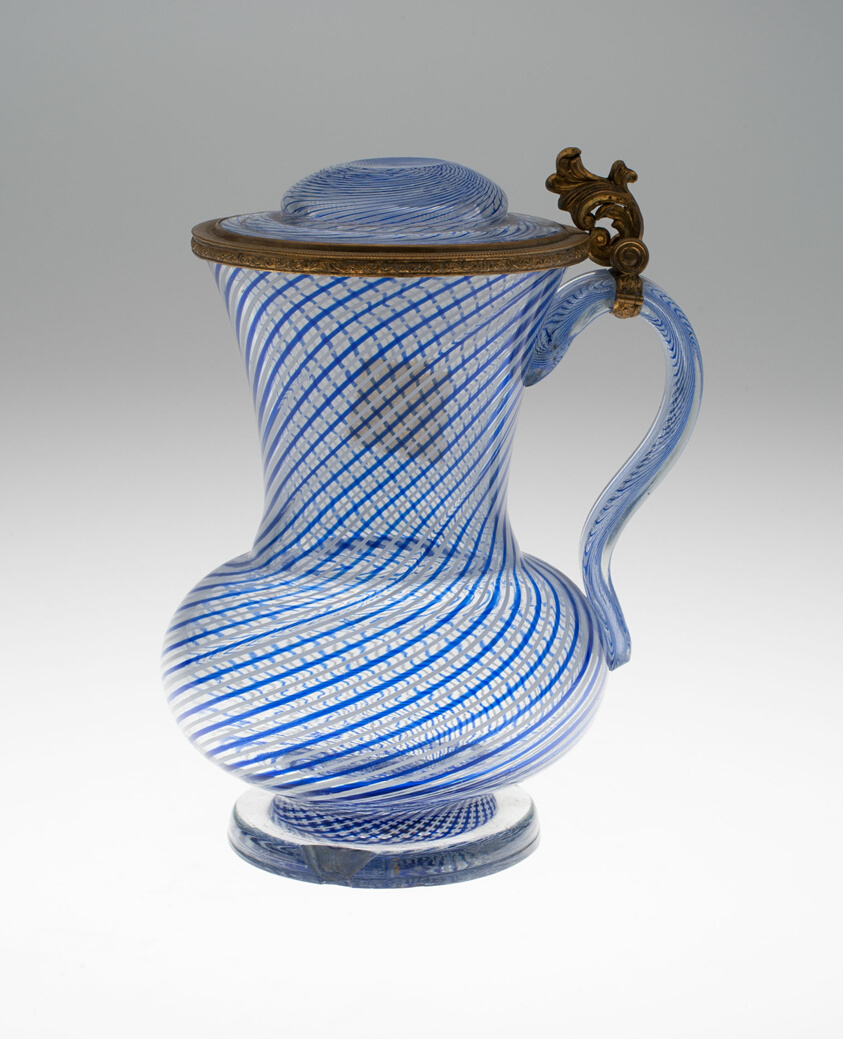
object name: Glass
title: Covered Mug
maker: Bohemia, Czech Republic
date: Early 19th century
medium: Glass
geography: Bohemia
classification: glass; european decorative arts